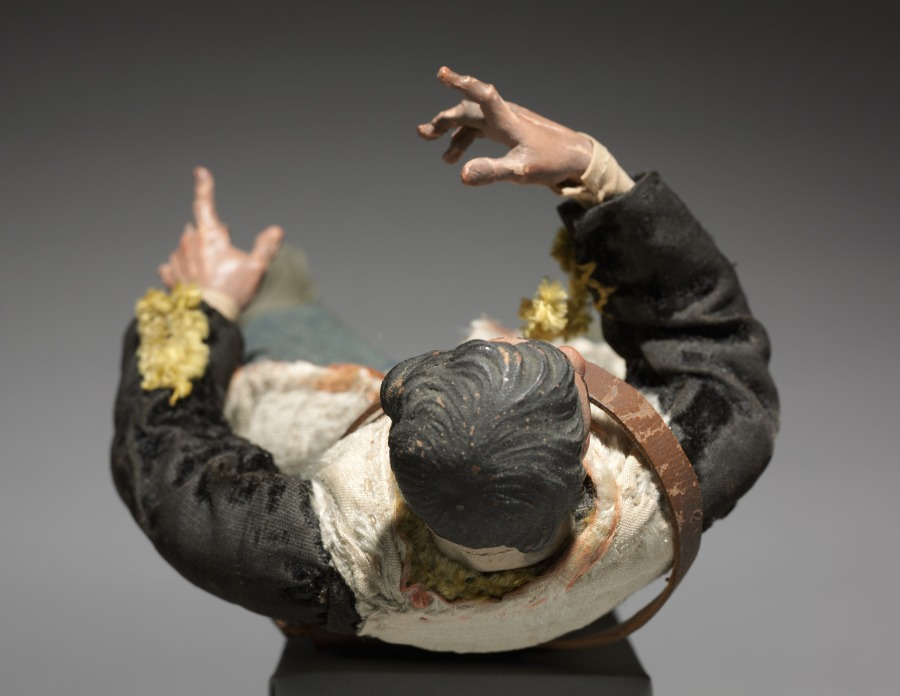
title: Figure from a Crèche: Standing Man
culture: Italy, Naples, late 18th-early 19th century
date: 1780–1830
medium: painted wood and terracotta with various textiles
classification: Sculpture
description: The practice of creating scenes of the Nativity for the home dates from the early 1700s in Italy, where people began to set up doll-like figures of about a foot or less in height. The custom was particularly popular in Naples around 1800, where crèche scenes (crèche means cradle, or crib) included many figures, whose heads and hands of painted terracotta, stuffed cloth bodies, and clothing adapted from contemporary local costumes gave them an amazingly realistic character. Representations of the birth of Jesus can be traced to the first few centuries of Christianity. Both living creatures and sculptural depictions of them were used from early times. By the late middle ages it was customary to create life-size figures of wood or stone, naturalistically painted, to represent the characters who participated in the events of Jesus's early life. These sculptures were then arranged in scenes illustrating one or both of the most important of these events, the Adoration of the Shepherds and the Adoration of the Magi-the three kings from the East who came to pay homage to the Christ child. Used in churches, these large figures were especially popular in Italy, Central Europe, Spain, and Portugal.